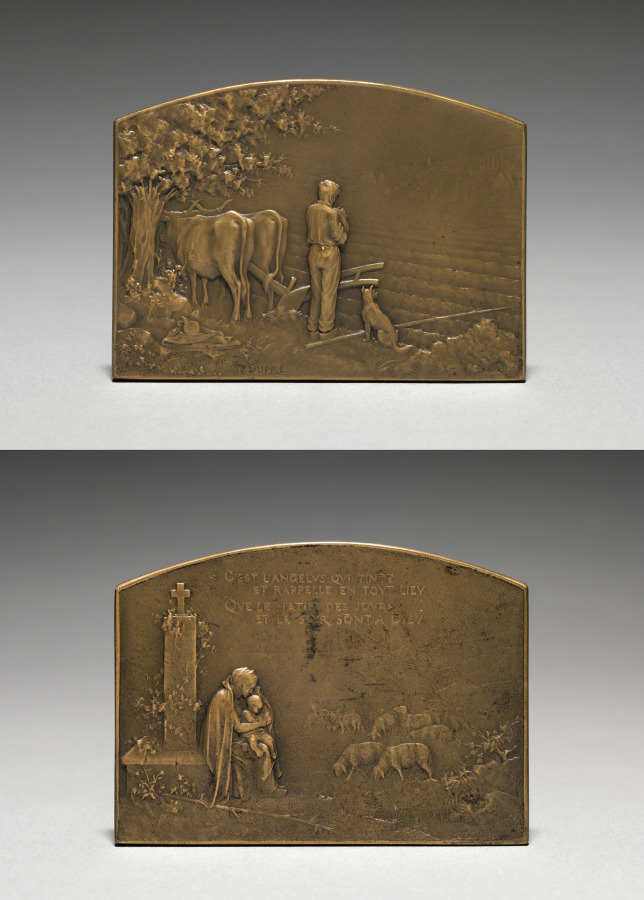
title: Medallion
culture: France, 19th-20th century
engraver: Georges Dupré (French, 1869–1909)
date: 1903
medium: bronze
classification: Metalwork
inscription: signed: "G. Dupré."